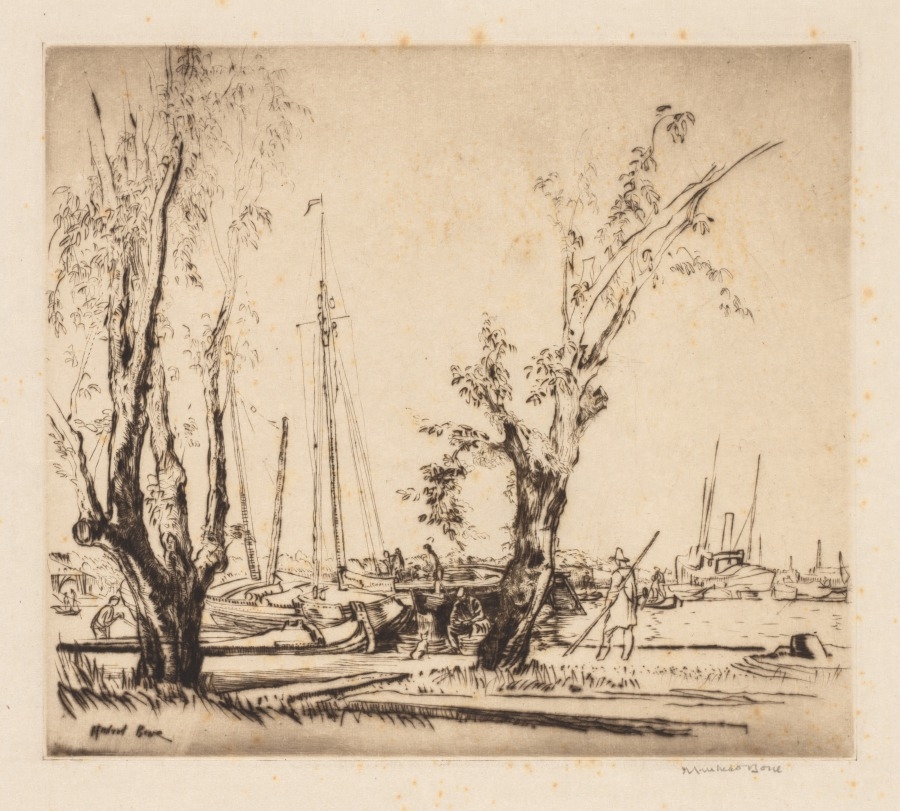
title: On the Y, Amsterdam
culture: Britain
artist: Muirhead Bone (British, 1876–1953)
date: 1913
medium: drypoint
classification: Print